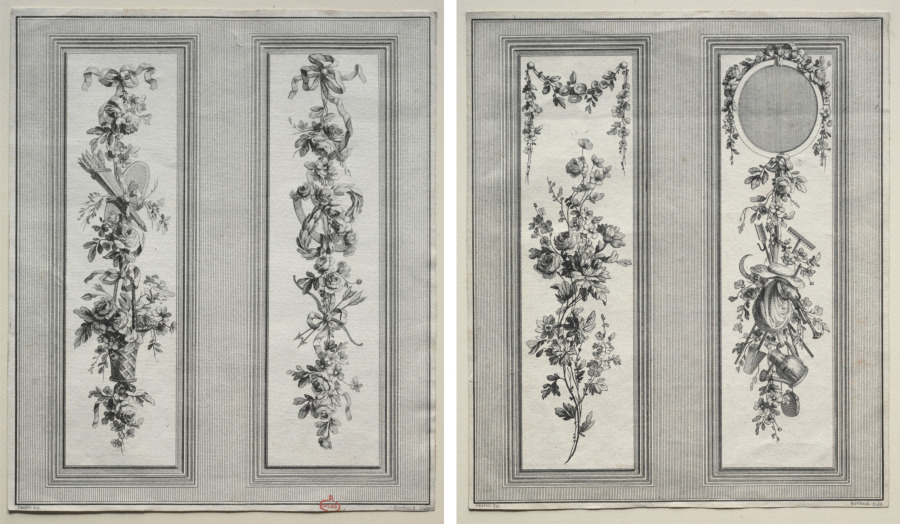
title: Garden Ornament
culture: France, 18th century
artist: Pierre Gabriel Berthault (French, 1748–1819)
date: c. late 1700s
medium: engraving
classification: Print